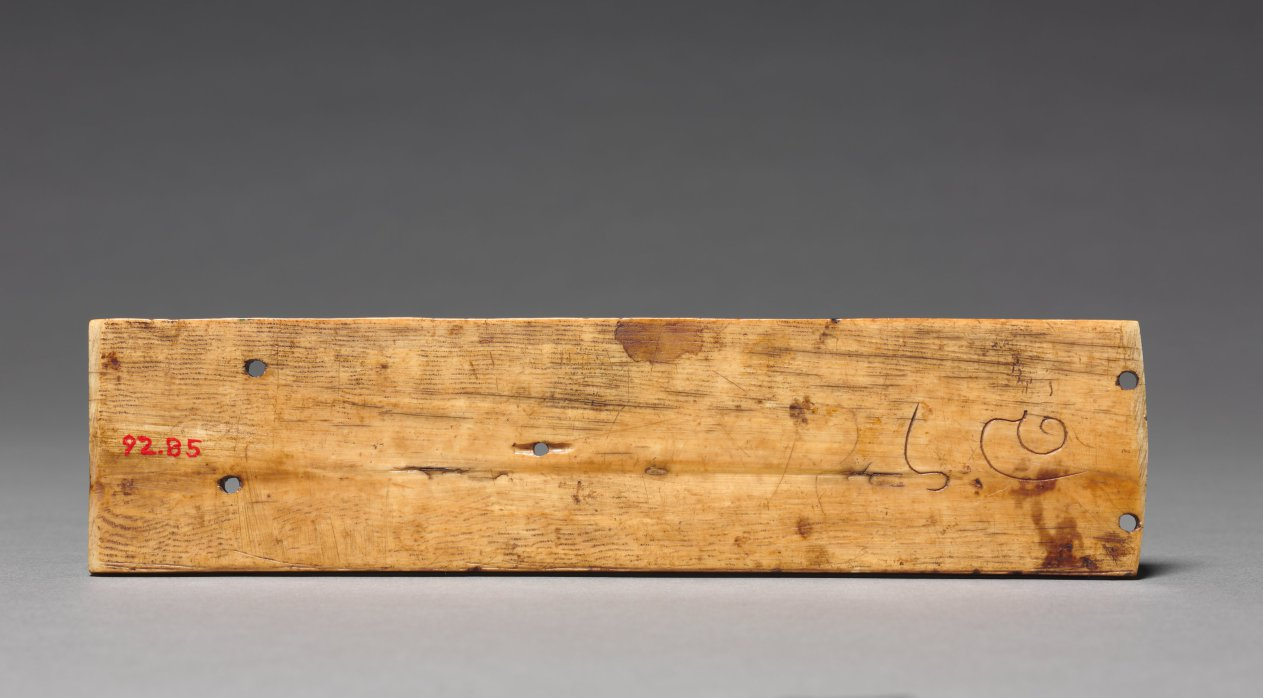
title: Cover of a Palm-Leaf Manuscript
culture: Ceylon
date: 1600s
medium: ivory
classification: Ivory